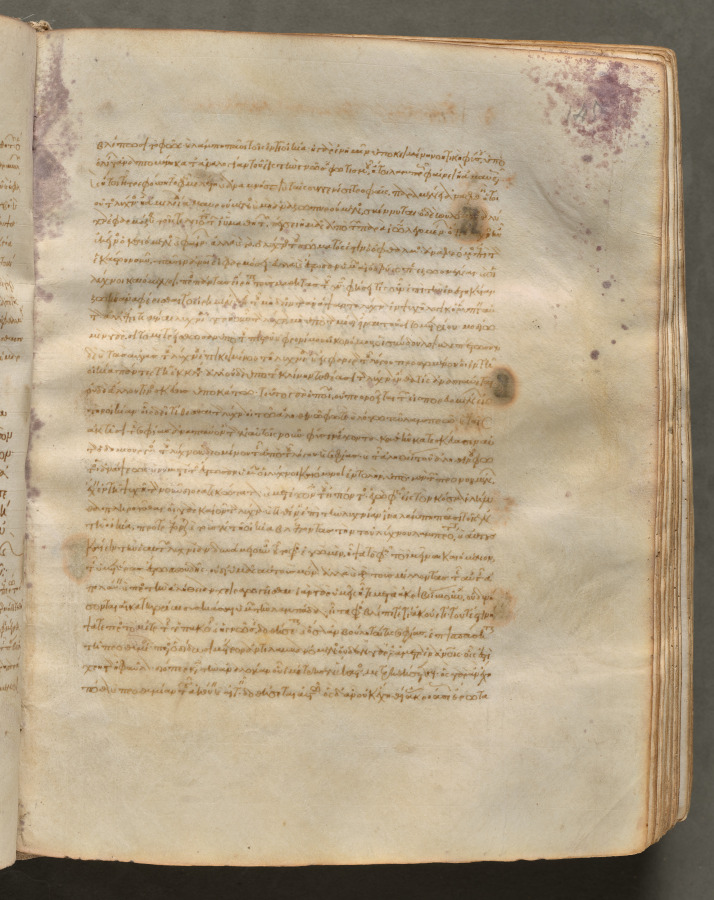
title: Text, folio 145 (recto), from a Gospel Book with Commentaries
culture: Byzantium, Constantinople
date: c. 1000–1100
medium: ink, tempera, and gold on vellum; leather binding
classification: Bound Volume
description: Each of the four gospels in this book opens on a page with brilliantly illuminated borders depicting the author of the text as well as birds-principally peacocks, symbols of the immortality of the soul-and fountains, representing the fountain of life and the salvation of the soul. This volume consists of 428 leaves with texts in Greek. Its level of sophistication suggests that it was probably written and decorated in a monastery in Constantinople.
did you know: Gospel Books were carried in procession through Byzantine churches.